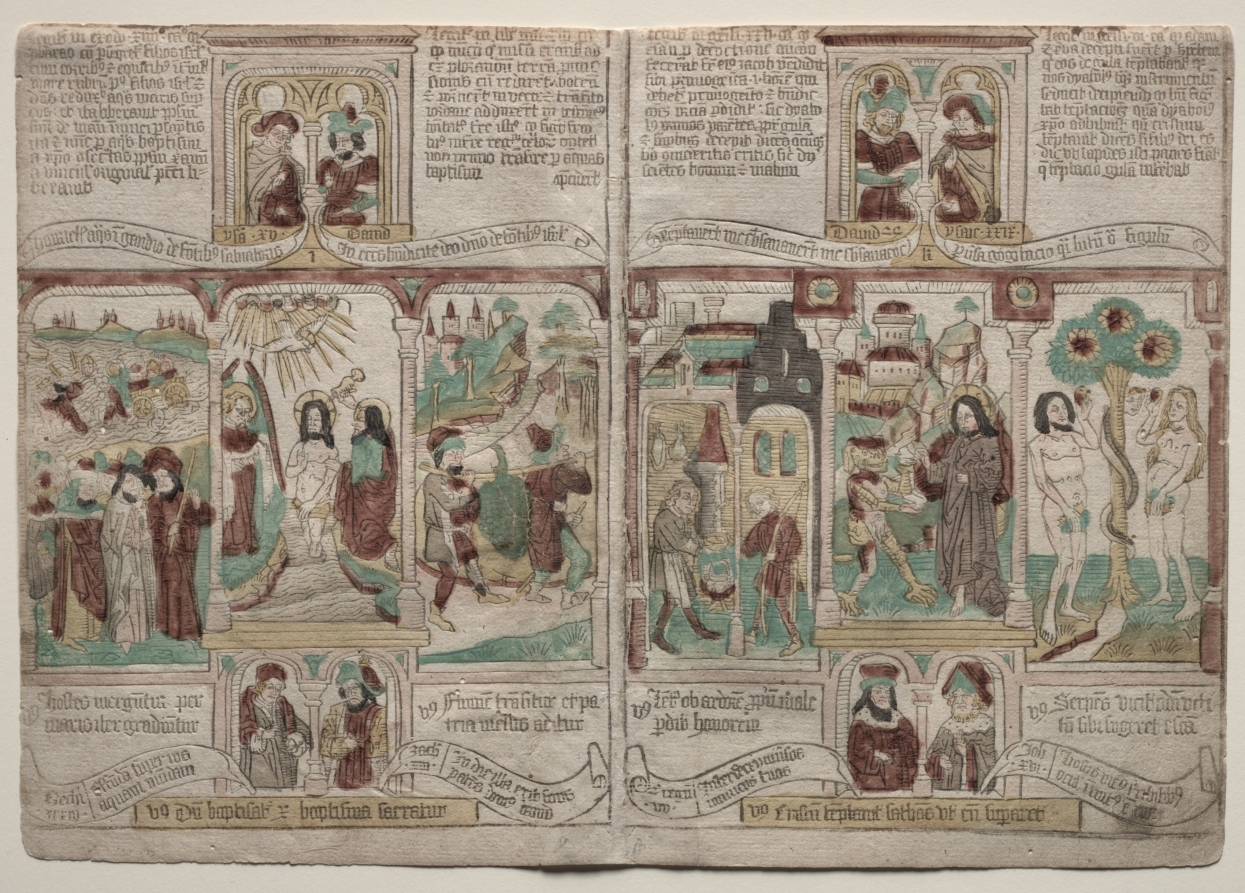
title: The Bible of the Poor (Biblia Pauperum), Pharaoh's Army Drowned in the Red Sea; Baptism of Christ; and Moses' Spies Returning with Grapes from Canaan Esau Selling Jacob his Birthright; Temptation of Christ; and Temptation of Adam and Eve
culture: Germany or the Netherlands, 15th century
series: Biblia Pauperum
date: c. 1465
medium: woodcut, hand colored with watercolor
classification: Print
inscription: text, in block: [see object file]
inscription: lower center, in graphite: 9 10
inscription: verso, lower left, in graphite: 61083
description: This hand-colored leaf is from the blockbook Biblia Pauperum (Bible of the Poor), which served as an educational handbook for laymen and clerics. Blockbooks, in which images and text were carved in relief from a single block of wood, are the earliest form of printed text in Europe. On each page, two Old Testament episodes flank a New Testament scene, implying a connection between the stories. At left is Christ’s baptism between the Pharaoh’s drowned army and spies returning from Canaan. To the right is Christ’s temptation bordered by Esau selling his birthright to Jacob and the temptation of Adam and Eve.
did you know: This sheet was hand-colored with a limited palette, so that black, for example, plays dual roles of the color of hair, and the shadow on a building.